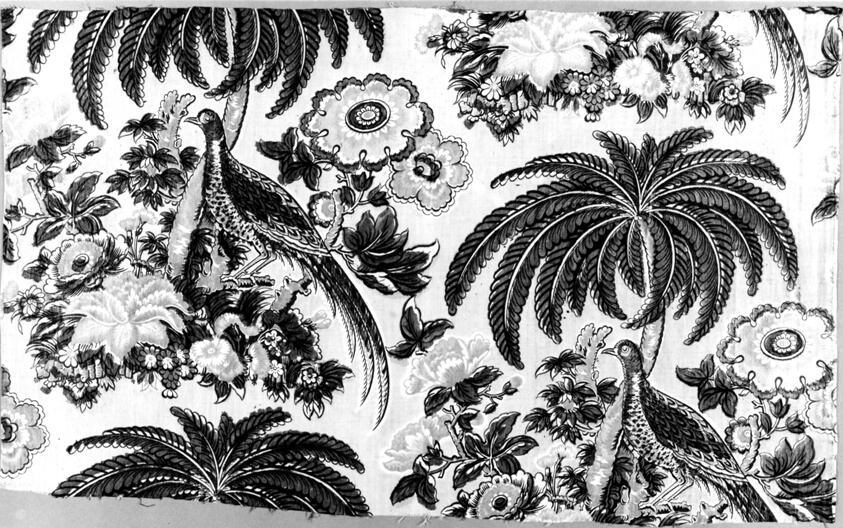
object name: Textile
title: Panel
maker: Printed at Bannister Hall Print Works (English, active 1799-1840); Preston, Lancashire, England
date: c. 1815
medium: Cotton, plain weave; block printed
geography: Preston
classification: textile; weaving - printed